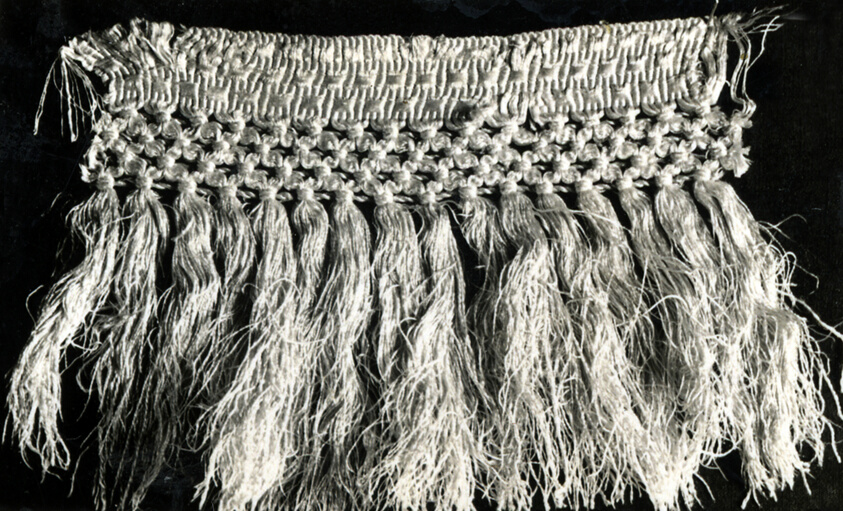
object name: Textile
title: Fringe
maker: Italy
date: 18th century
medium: silk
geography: Italy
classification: textile; weaving